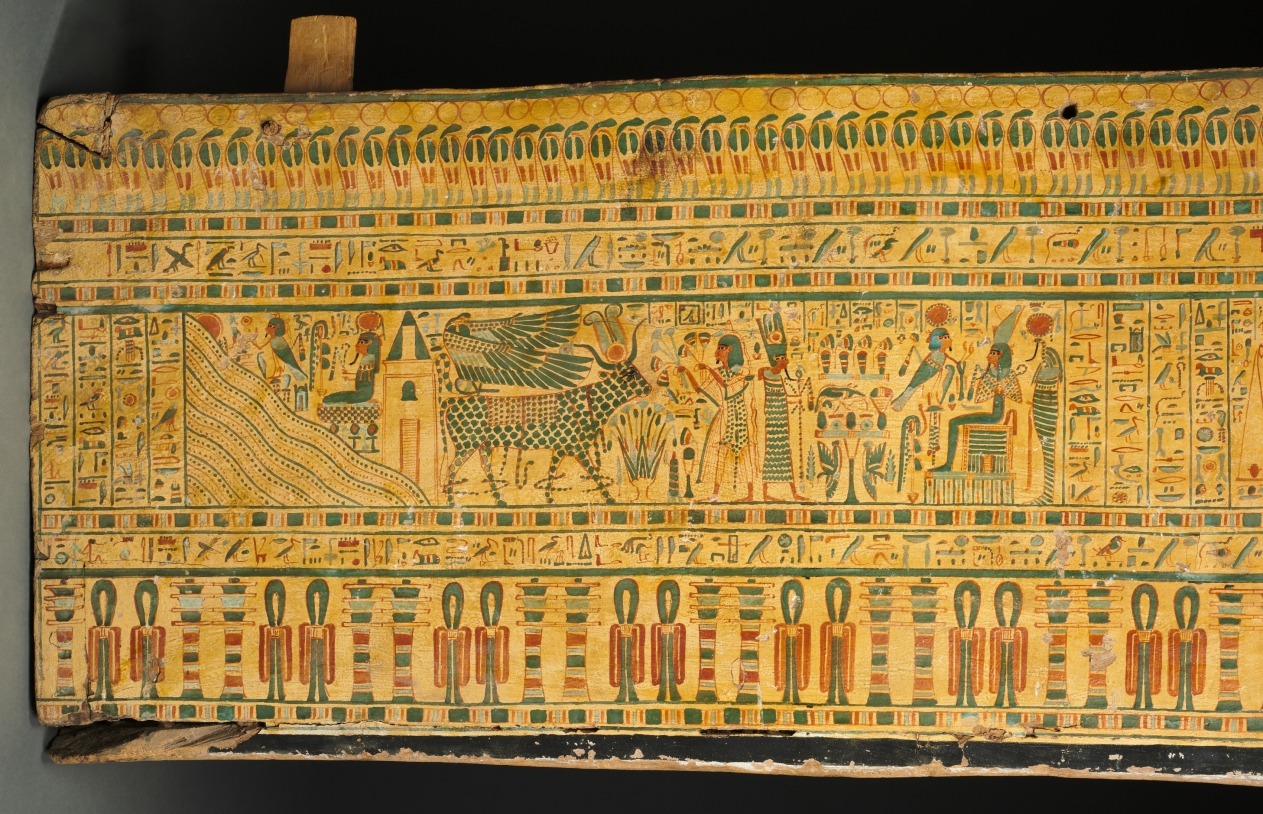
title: Coffin of Bakenmut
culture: Egypt, Thebes, Third Intermediate (1069–715 BCE), Dynasties 21–22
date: c. 1000–900 BCE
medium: gessoed and painted sycamore fig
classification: Funerary Equipment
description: The coffin of Bakenmut is one of the finest examples of painted wooden coffins made for the priests of Amen and their families at Thebes during Dynasty 21 and early Dynasty 22. The pharaohs of this time were no longer buried in the Valley of the Kings, but instead built tombs in the Delta, far to the north, where they resided. Security was lax in the Theban necropolis. The coffins and funerary goods of the wealthy citizens of Thebes were placed in unmarked and undecorated family tombs cut into the cliffs on the west bank of the Nile. All the care and detail that in more prosperous times were devoted to the decoration of the tomb chapel were now lavished on the elaborately painted coffins. Every available surface is crowded with religious scenes, images of funerary gods and goddesses, protective spells, and magical symbols. The deceased appears mummiform. An elaborate floral collar entirely covers the upper body, exposing only the separately attached hands (now lost). A pair of red "mummy braces" are crossed over the chest, their point of intersection marked by a winged sun disk. The lower body is covered with tiny figures modeled in gesso against a yellow background, which gives the effect of gold inlaid with glass or semiprecious stone. The decoration on the interior features two deified dead kings of Dynasty 18. Although these rulers had lived centuries before, memory of their greatness was still very much alive. The main scene near the top depicts Tuthmosis III, the great military pharaoh, who lived 500 years before Bakenmut. Posed as a mummy, the ruler wears a brilliant feathered garment enfolding him with falcon’s wings. The scene below features back-to-back seated images of Amenhotep I, regarded as the patron of the Theban cemetery and worshiped as a local god there.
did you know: Originally another smaller coffin was placed inside this outer coffin and in that the deceased with a mummy board would have rested.